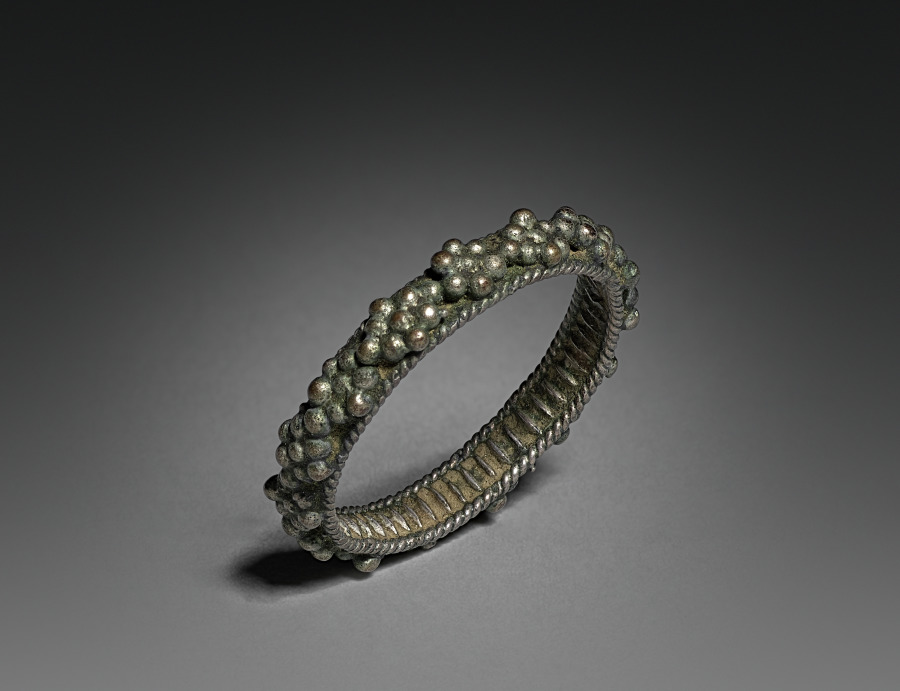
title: Ring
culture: India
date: 1800s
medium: silver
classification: Jewelry